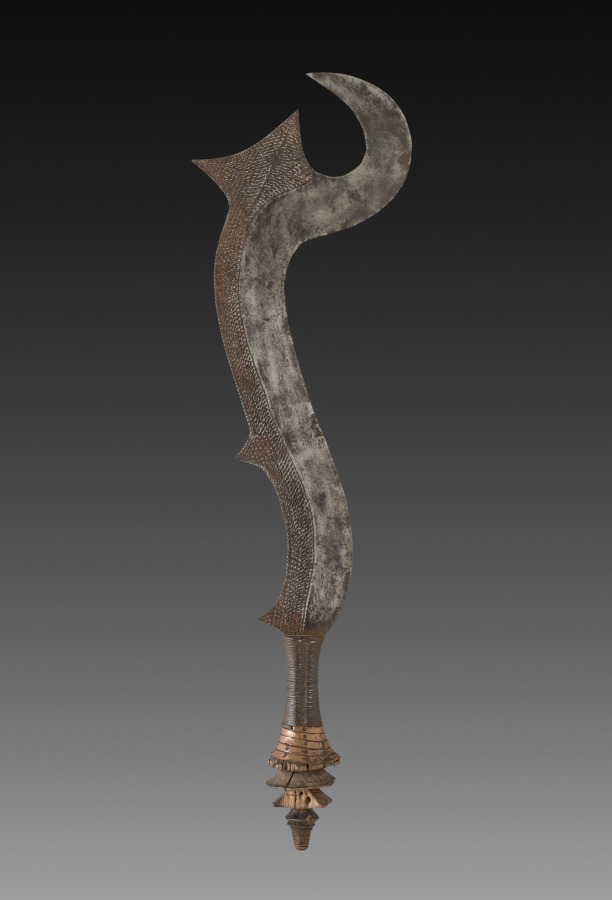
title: Ceremonial Sword (ngulu)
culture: Africa, Central Africa, Democratic Republic of Congo, Ngombe-style, Doko-style, or Iboko-style maker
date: 1800s–1900s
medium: Iron alloy, wood, copper alloy, and pigment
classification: Arms and Armor